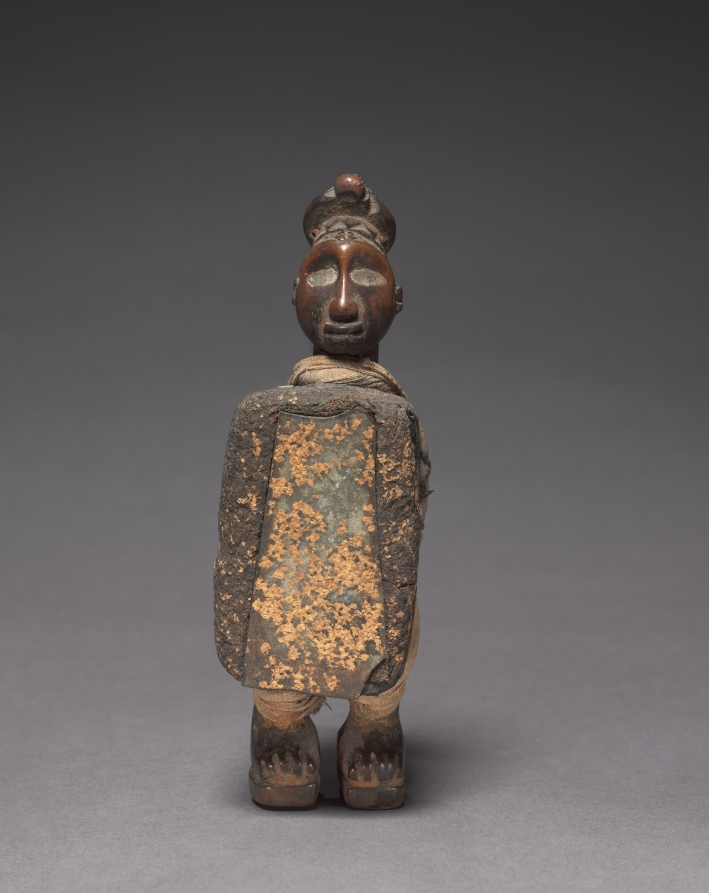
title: Male Figure (Nkisi)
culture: Africa, Central Africa, Democratic Republic of Congo (most likely), Cabinda, or Republic of the Congo, probably Yombe-style maker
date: late 1800s-early 1900s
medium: Wood, organic material (including resin), metalized glass, and cloth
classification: Sculpture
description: Nkisi is often associated with the word spirit, as these figures are believed to host a variety ancestral spirits. With an intact mirror-covered stomach cavity, this figure was not decommissioned before sale or disposal, deeming its particular powers sustained. The cloth knots and carvings suggest that it was used to bind agreements or oaths, and to reconcile social and cosmological contradictions.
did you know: The medicinal substances remain intact in this particular figure, which is rare, as most were decommissioned before museum acquisition.